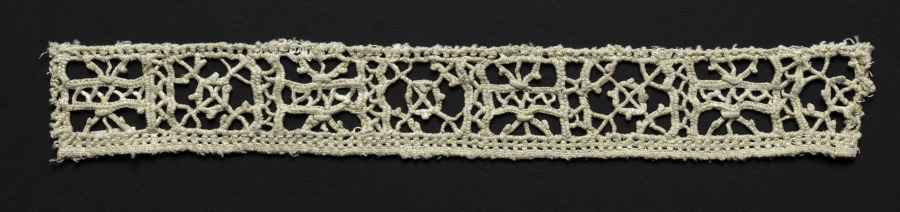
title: Lace Fragment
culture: Italy, 1600s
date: 1600s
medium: Linen: needle lace (Reticella) insertion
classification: Lace